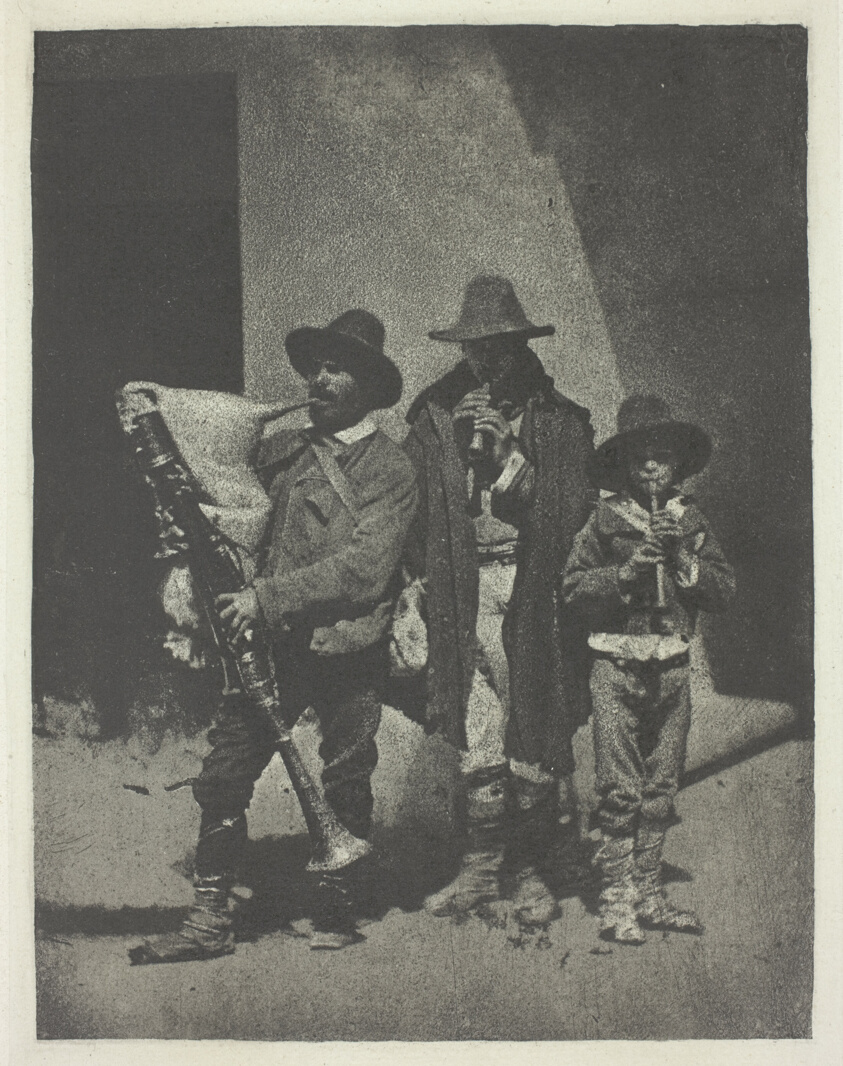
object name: Photograph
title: Street Musicians Standing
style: 19th century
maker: Charles Nègre (French, 1820–1880)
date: c. 1855, printed 1982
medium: Photogravure, from the portfolio "Charles Negre: Treize Heliogravures, 1854–1857" (1982)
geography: France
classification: photogravure; photomechanical process; photography; photograph